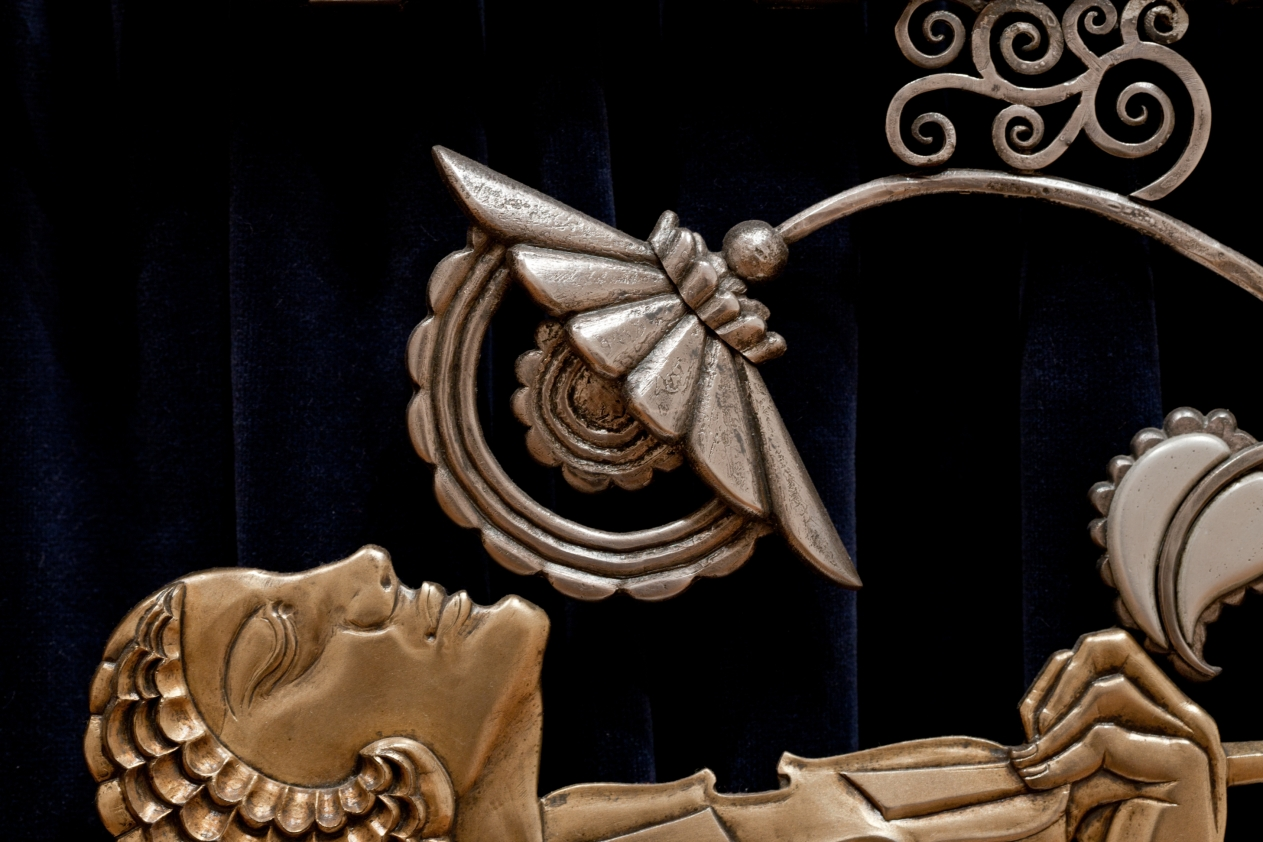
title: Muse with Violin Screen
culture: America, Ohio, Cleveland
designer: Paul Fehér (American, born Hungary, 1898–1990)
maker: Rose Iron Works (America, Ohio, Cleveland, est. 1904)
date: 1930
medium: Steel, brass; silver and gold plating, cotton velveteen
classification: Metalwork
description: Since the early years of the 20th century, the Rose Iron Works, a Cleveland supplier of architectural ornament, has produced distinguished metalwork. The company’s founder, Martin Rose, was born in Austria-Hungary and studied ornamental metalsmithing in Vienna prior to immigrating to Cleveland in 1902. In the 1920s, he hired a talented young Parisian designer, Paul Fehér, to work for the firm. Fehér’s designs, culminating in this massive screen, brought a modern European sensibility to the Rose Iron Works production. With its geometric patterning, highly stylized and abstracted natural forms, and the central figure reminiscent of the celebrated jazz singer Josephine Baker, this screen reflects the classic motifs of Art Deco design.